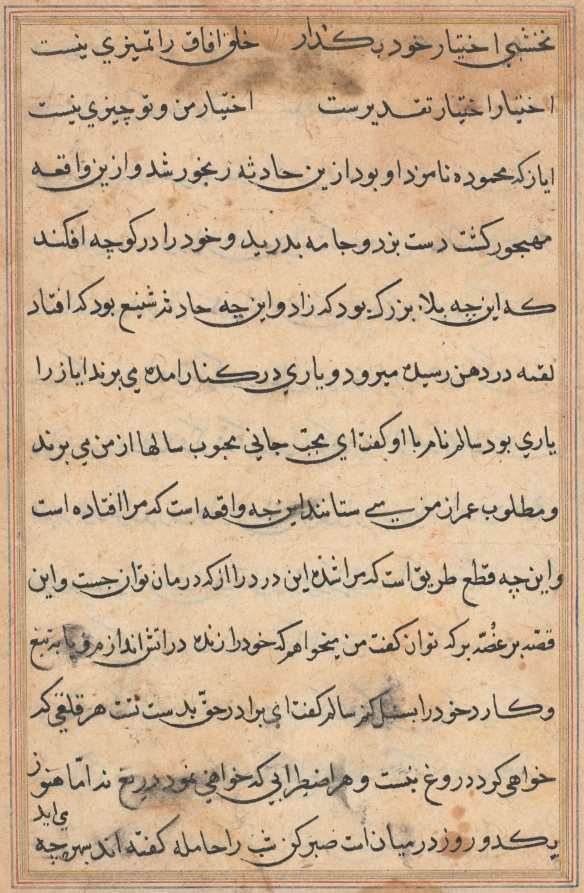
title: Page from Tales of a Parrot (Tuti-nama): text page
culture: Mughal India, court of Akbar (reigned 1556–1605)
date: c. 1560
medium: gum tempera, ink, and gold on paper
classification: Painting